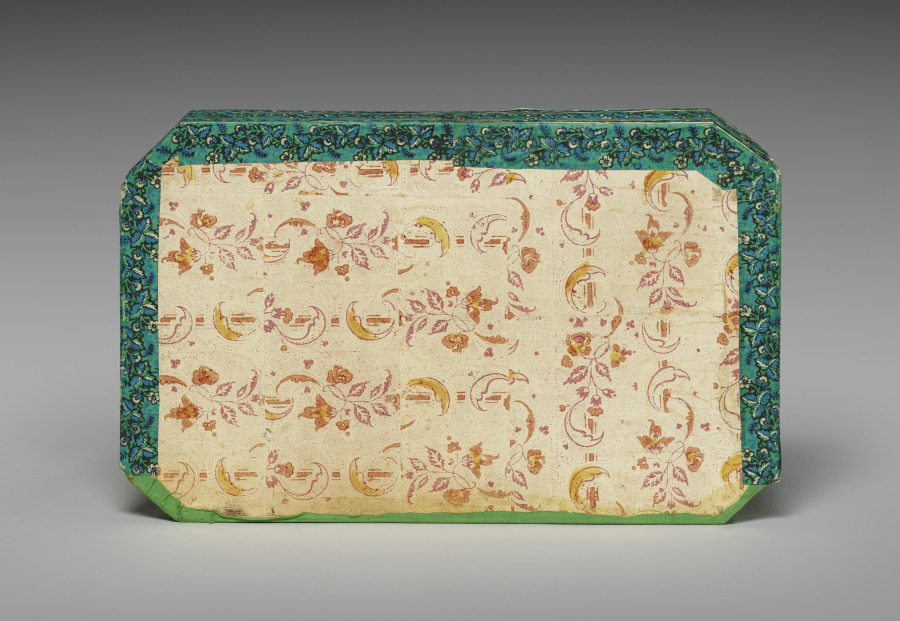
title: Chest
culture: Italy, Venice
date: 1700s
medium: leather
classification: Miscellaneous